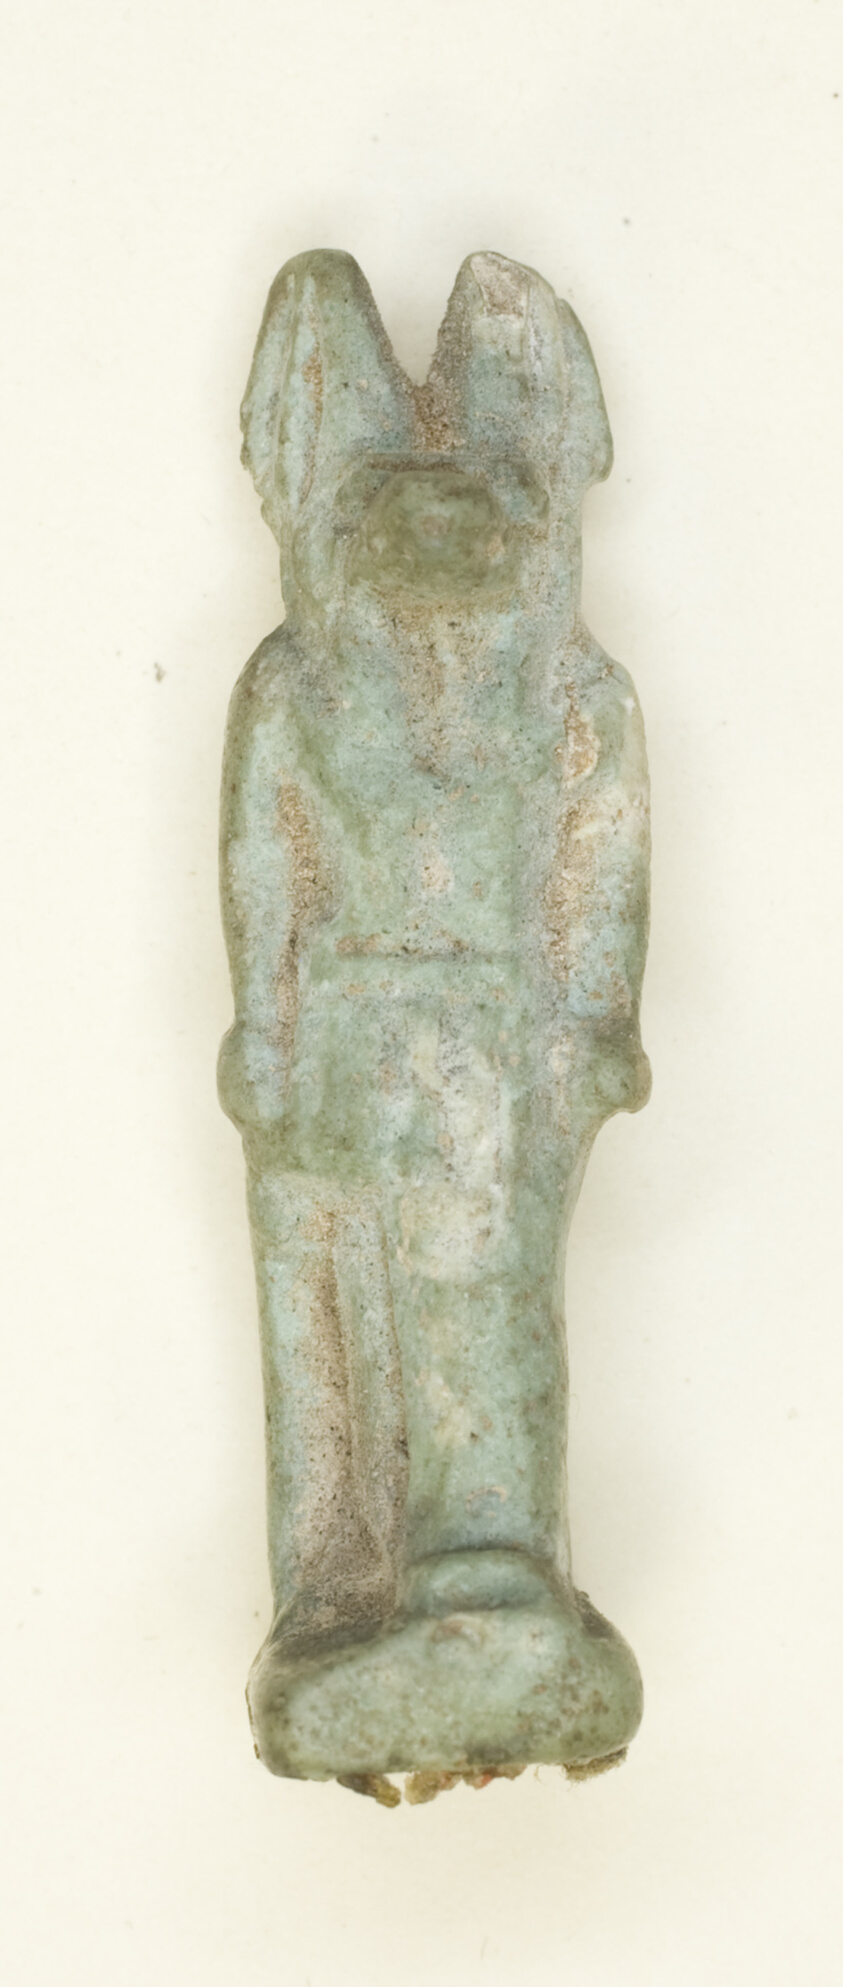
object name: Costume and Accessories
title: Amulet of the God Anubis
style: egyptian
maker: Egyptian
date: Late Period, Dynasties 26–31 (664–332 BCE)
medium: Faience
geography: Egypt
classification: amulet; jewelry; ceramics; ancient art; costume; faïence (composite material)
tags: gods (deities)